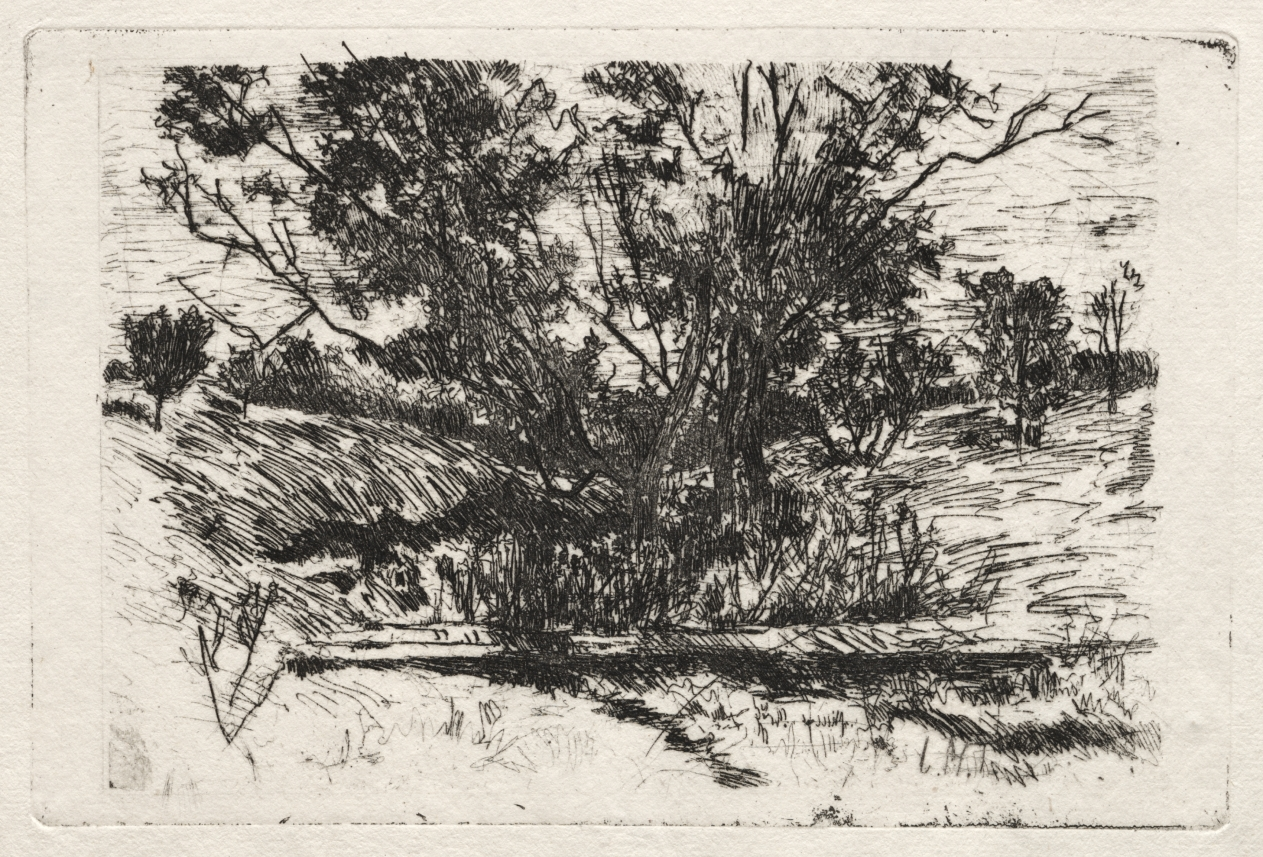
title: Landscape near Cincinnati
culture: America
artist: John Henry Twachtman (American, 1853–1902)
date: c. 1879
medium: etching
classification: Print